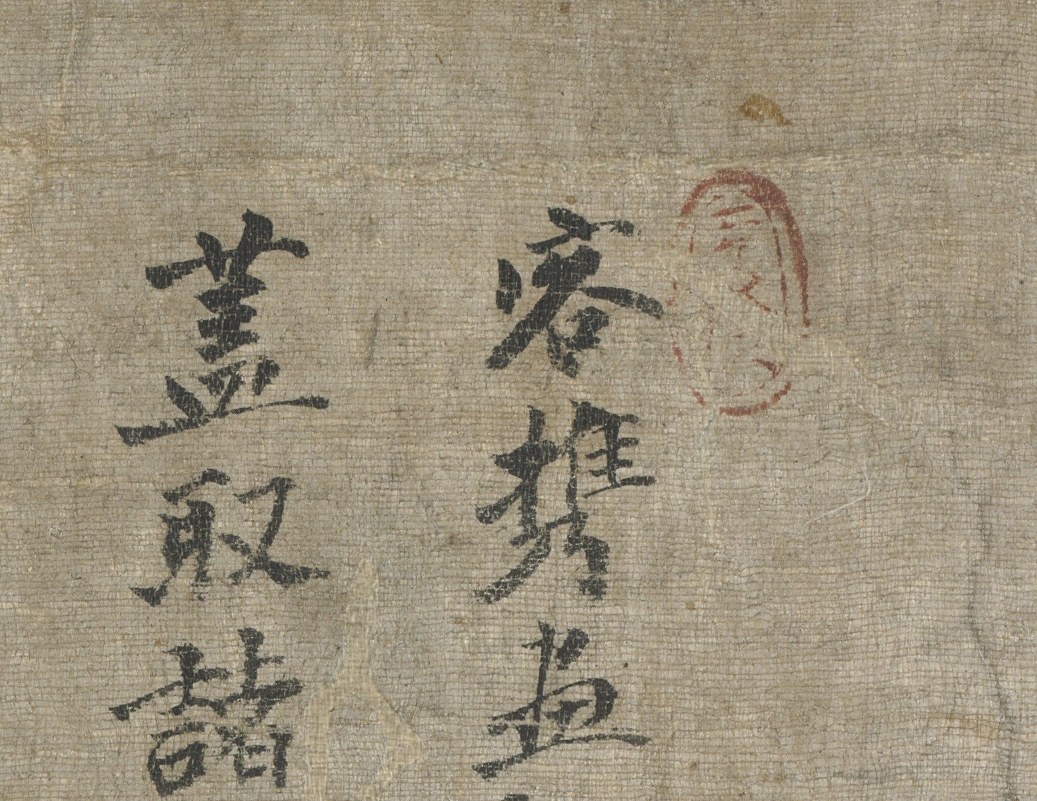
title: Landscape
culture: Japan, Edo period (1615–1868)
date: 1700s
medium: hanging scroll; ink and color on silk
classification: Painting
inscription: four inscriptions (one dated to 1414) by Japanese monks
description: This composition was fashioned after works created by Zen clerics of the Muromachi period (1392–1573), who often added their original Chinese-style poems above an ink painting to make a hanging scroll called a shigajiku. The poems here quote from essays on Sima Guang (1019–1086) by the Chinese Song dynasty literatus Su Shi (1037–1101). They interpret the studio surrounded with bamboo as a metaphor for the garden of Sima, the Song dynasty scholar-official who, in imitation of the Tang poet Bai Juyi, enjoyed the garden in isolation during his exile in Luoyang.